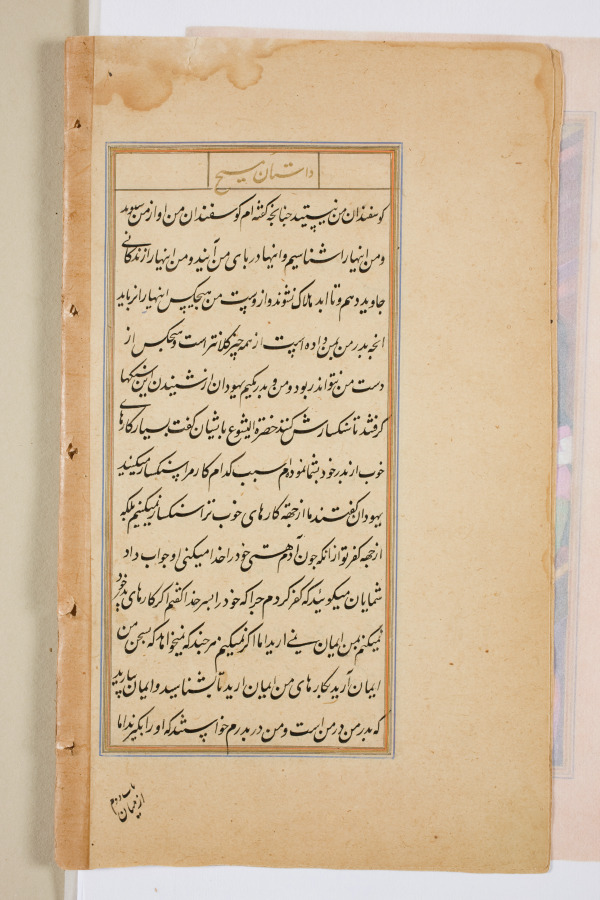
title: Text page from a Mirror of Holiness (Mir’at al-quds) of Father Jerome Xavier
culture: Mughal India, Allahabad, made for Prince Salim (1569–1627)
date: 1602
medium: Ink and gold on paper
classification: Manuscript